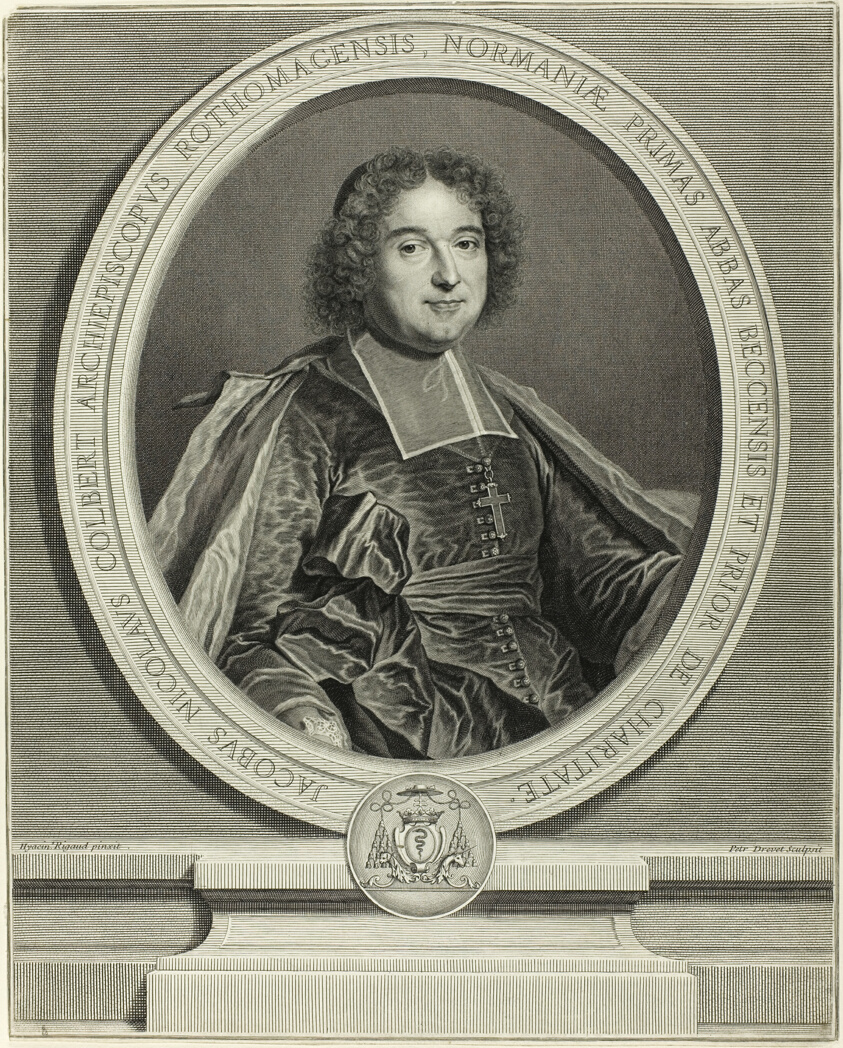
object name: Print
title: Portrait of Jacques Nicolas Colbert, Archbishop of Rouen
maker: Pierre Drevet (French, 1663-1738); after Hyacinthe Rigaud (French, 1659-1743)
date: after 1699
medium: Engraving on ivory laid paper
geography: France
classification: engraving; print; prints and drawing